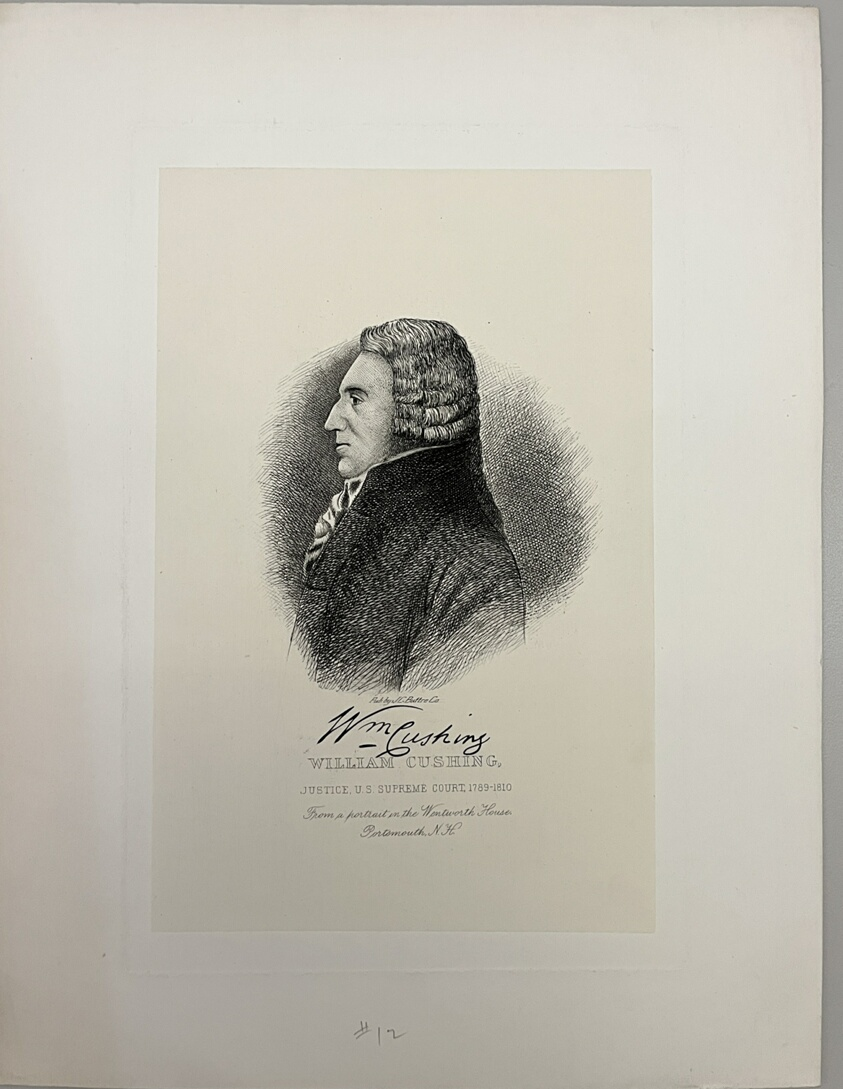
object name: Print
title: William Cushing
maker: Published by John Chester Buttre (American, 1821-1893)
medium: Etching on paper laid on ivory paper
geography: United States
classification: reproduction; print; prints and drawing